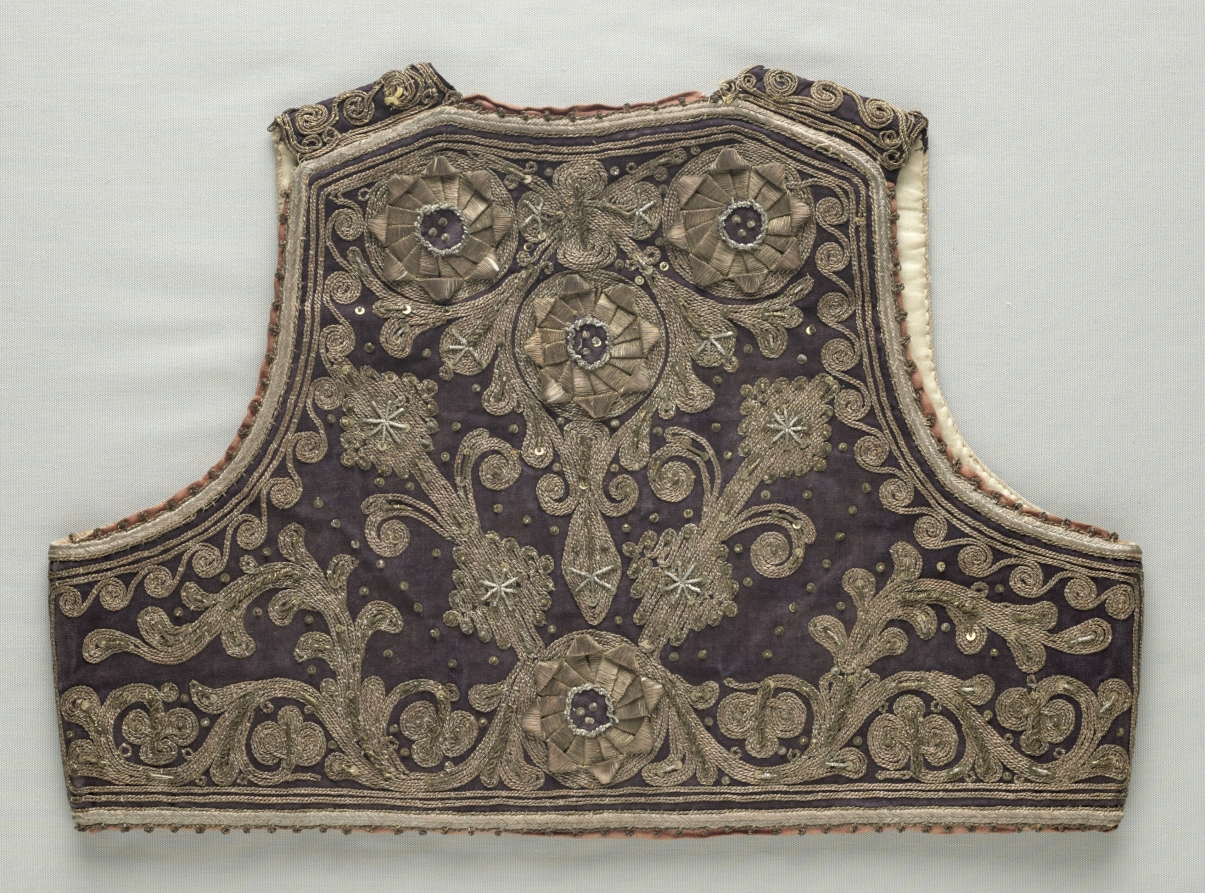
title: Vest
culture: Dalmatia, Late 19th century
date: late 19th century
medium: velvet, gold braid, sequins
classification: Garment